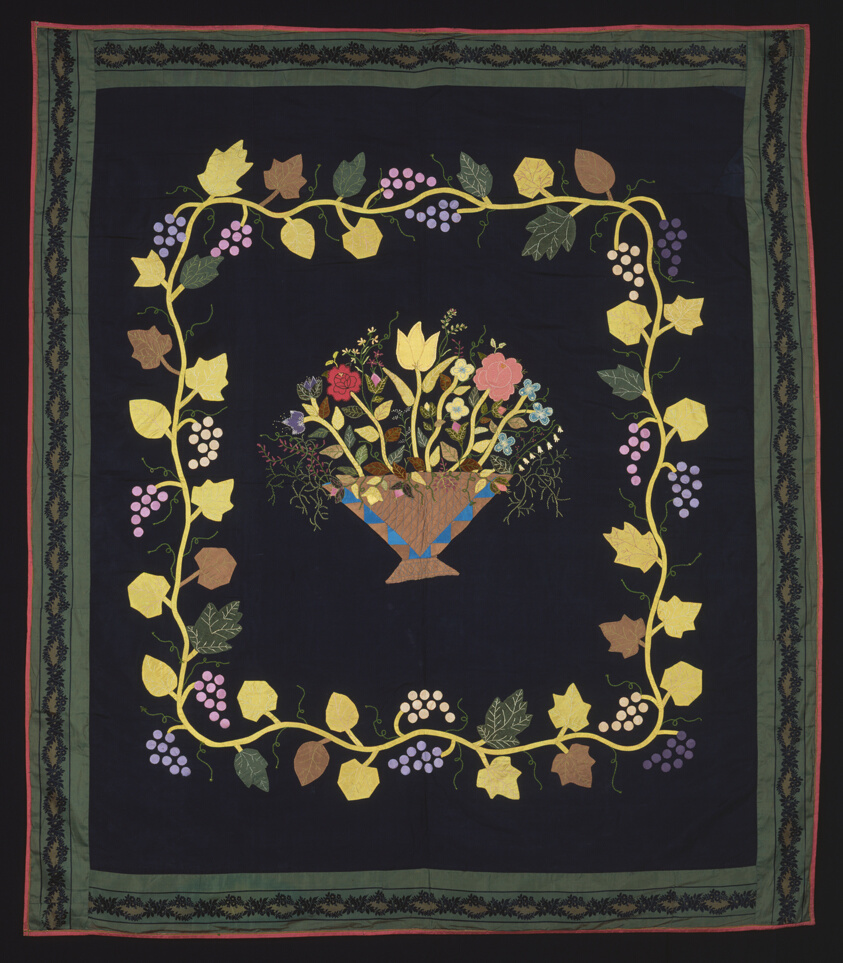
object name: Textile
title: Bedcover (Basket of Flowers Quilt)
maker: Made for the Bridges Family; United States, Kentucky, Lexington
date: c. 1860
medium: Silk, plain weave; appliquéd with silk plain weaves and silk and cotton, plain weaves cut solid velvet; sewn with silk and cotton, and embroidered with silk in chain, herringbone, satin, single back and stem stitches; French knots and couching; edged with silk, plain weave; backed with cotton, plain weave; glazed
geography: Kentucky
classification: textile; needlework - quilt